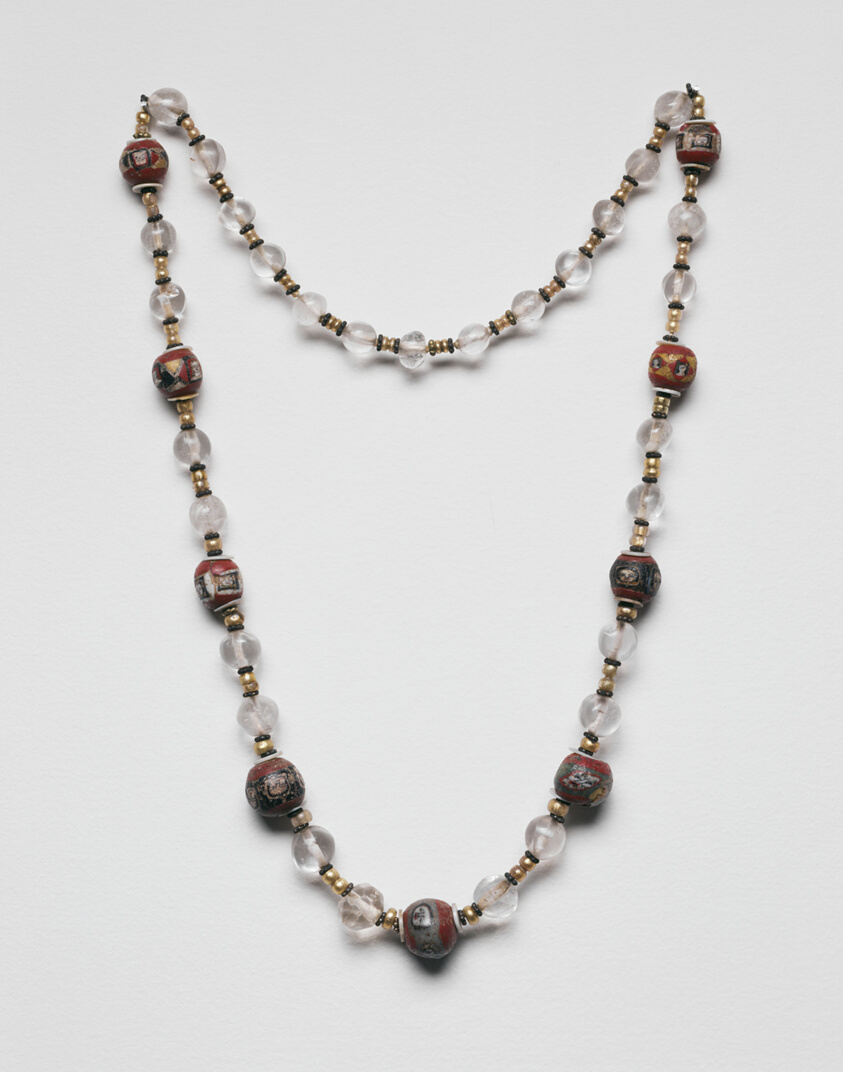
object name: Costume and Accessories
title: Necklace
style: ptolemaic, greco-roman (egyptian), ancient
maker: Roman; Egypt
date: 1st century BCE-1st century CE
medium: Glass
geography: Ancient Egypt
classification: necklace; glass; jewelry; ancient art; costume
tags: beauty, rituals